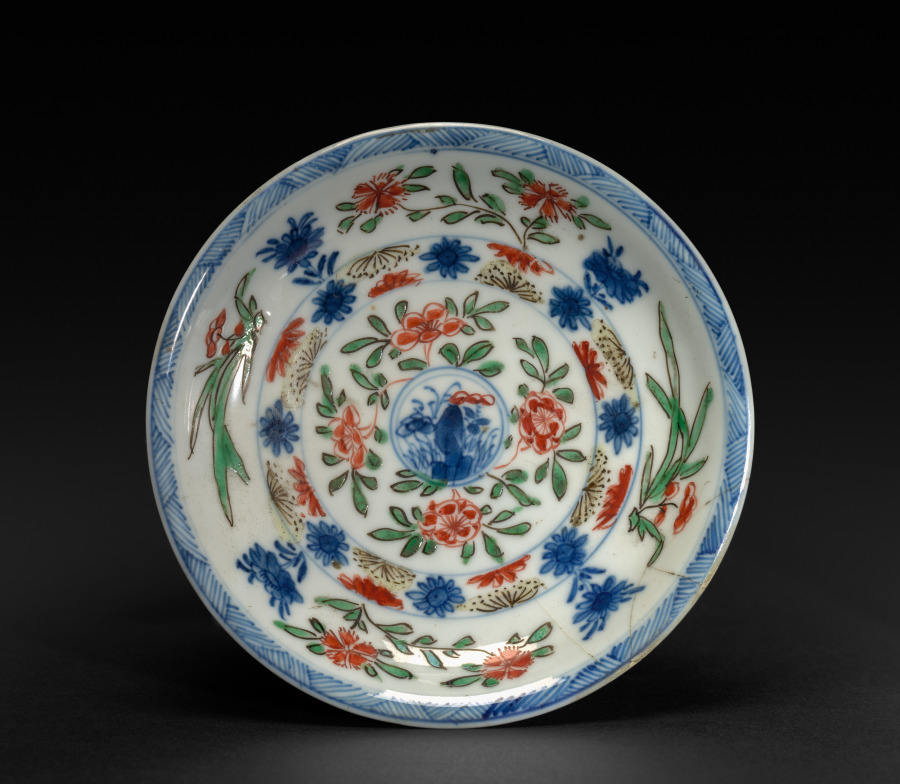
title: Saucer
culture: China, Qing dynasty (1644-1911), Kangxi reign (1662-1722)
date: 1662–1722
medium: porcelain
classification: Ceramic